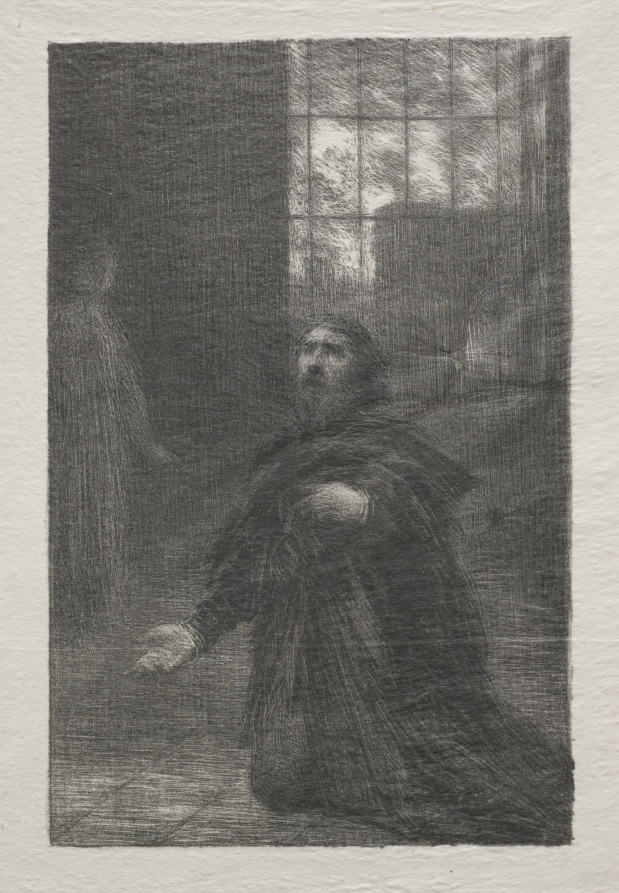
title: Rienzi, Act V: Rienzi’s Prayer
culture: France, 19th century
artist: Henri Fantin-Latour (French, 1836–1904)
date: c. 1886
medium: lithograph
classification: Print